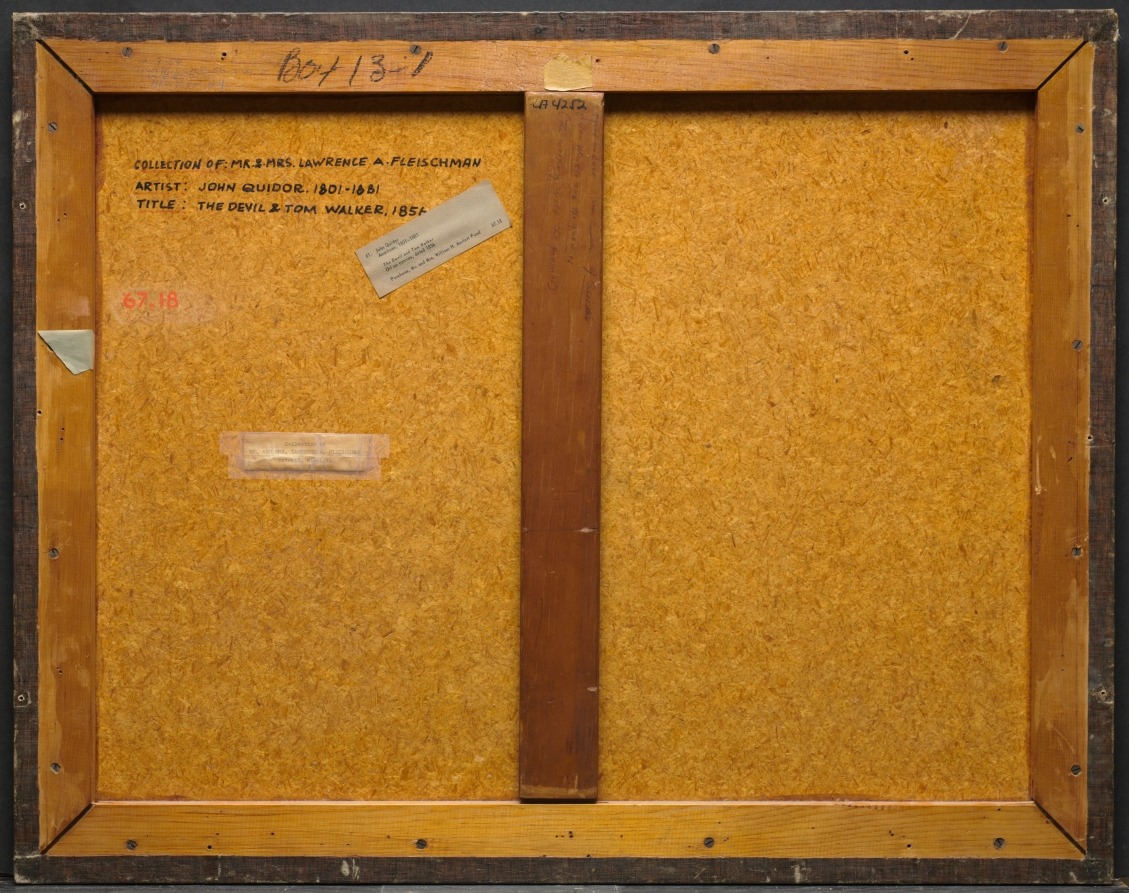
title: The Devil and Tom Walker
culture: America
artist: John Quidor (American, 1801–1881)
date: 1856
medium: oil on canvas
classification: Painting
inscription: Signed lower center: "J. Quidor / N.Y. 1856"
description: An eccentric and cantankerous man, John Quidor achieved fame in his lifetime for paintings of banners and fire engines, none of which survive. Today he is remembered for a series of fantastic, grotesque paintings based on the stories of Washington Irving (1783-1859)-a series whose exuberant style differs from the general run of American genre paintings, which tend to be more understated in mood and realistic in style. The Devil and Tom Walker belongs to this curious group of works. It portrays a scene from Irving's Tales of a Traveler (1824), in which Tom Walker, who was "not a man to be troubled with any fears," encounters the Devil while on an evening outing.